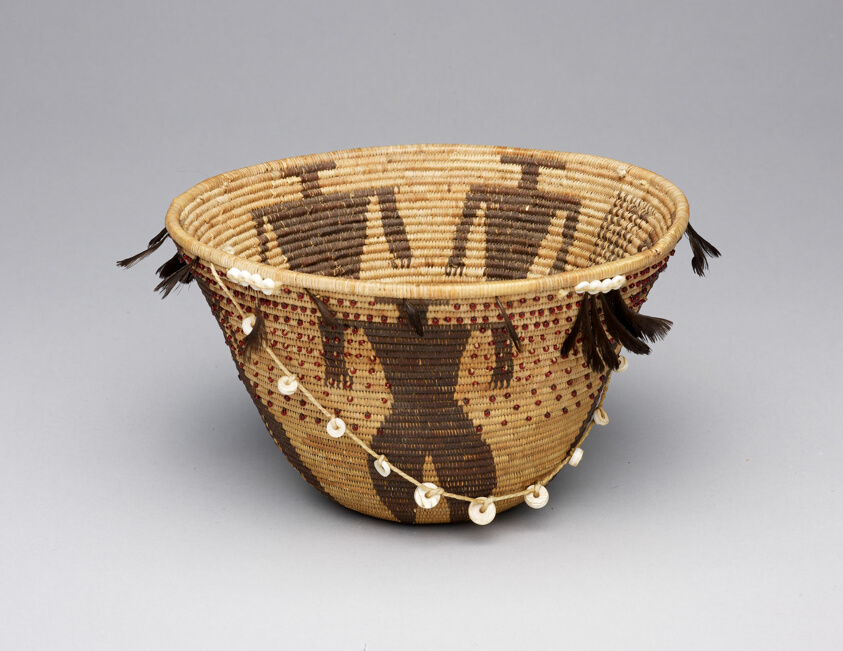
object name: Basketry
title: Figured Gift Basket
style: pomo, native american, northern california, americas, native north american, Arts of the Americas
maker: Pomo (Northern California, United States)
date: c. 1890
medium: Vegetable fibers, glass and clamshell beads, and quail feathers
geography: California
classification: basketry; bead; featherwork; shell; art of the americas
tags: basketry, baskets, figures (representations), abstract figures